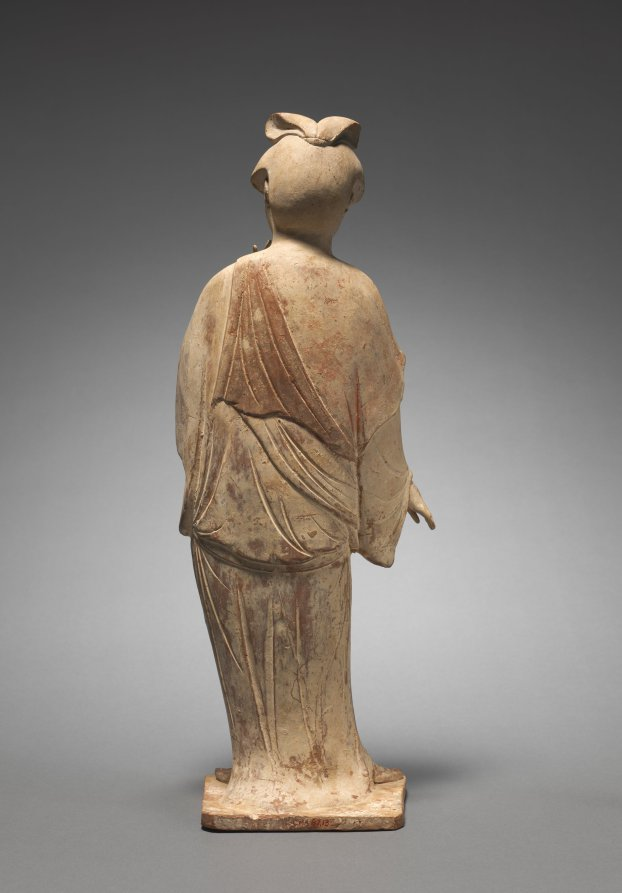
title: Woman Holding Plum Blossoms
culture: North China, Tang dynasty (618-907)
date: mid-700s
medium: earthenware covered in white slip with traces of pigment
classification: Sculpture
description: Tang figurines placed in the tombs give a vivid picture of everyday life. Images of elegant ladies in various hairstyles, costumes, and activities suggest the fashion of the time. This example of a plump and flamboyant lady is a common type found in mid-8th-century tombs, especially in the cosmopolitan city of Xi'an. Together with other figurines—court officials, musicians, dancers, hunters, foreign travelers, horses, camels, guardian warriors, and guardian animals—such tomb sculptures accompanied the deceased in the afterlife.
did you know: Tang aristocratic women had a high degree of freedom, especially in contrast with the Neo-Confucianism of the later Song dynasty.